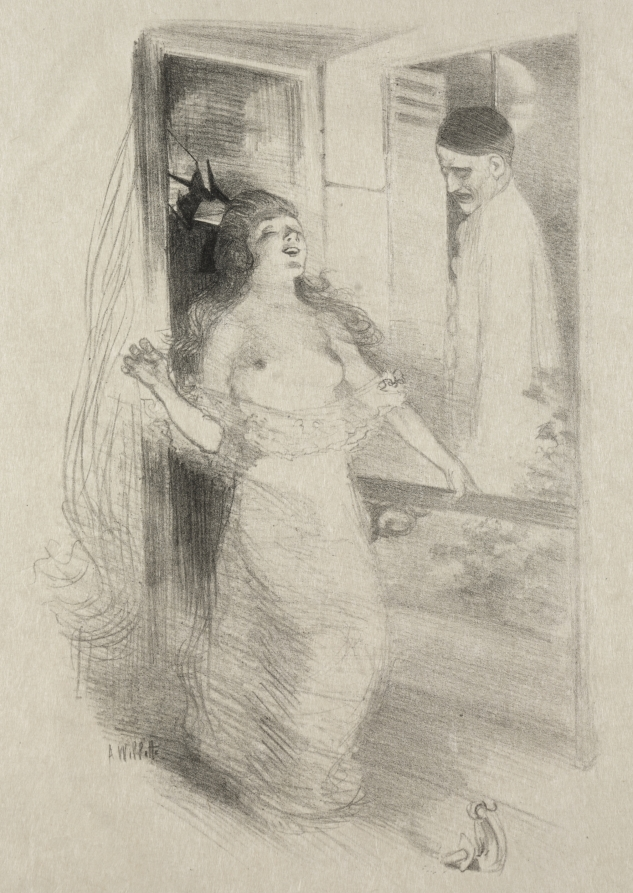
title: Pierrot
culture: France, 19th century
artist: Adolphe Léon Willette (French, 1857–1926)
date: c. 1892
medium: lithograph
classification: Print